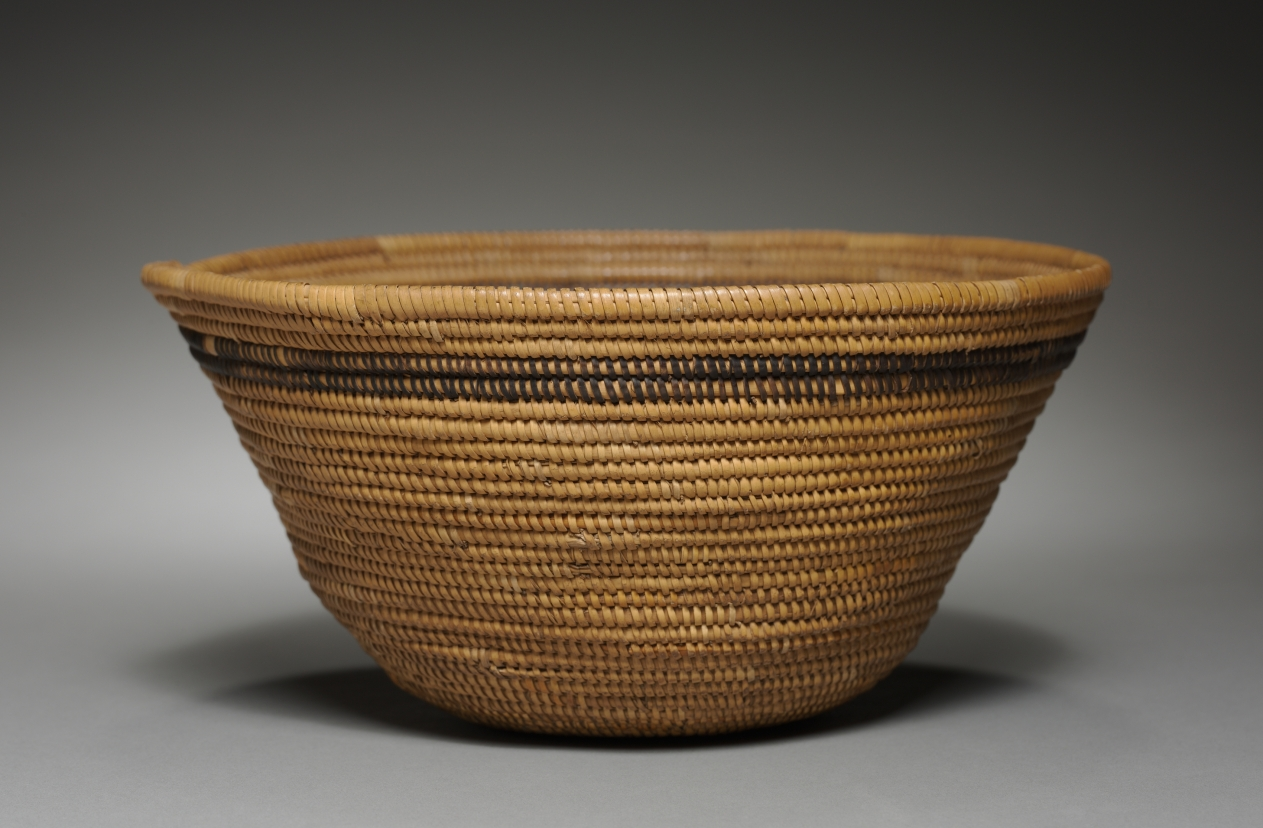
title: Hat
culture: California, Southern, Late 19th- Early 20th century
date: c 1875– 1925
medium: Juncus, Sumac; Coiled; Deergrass foundation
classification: Basketry